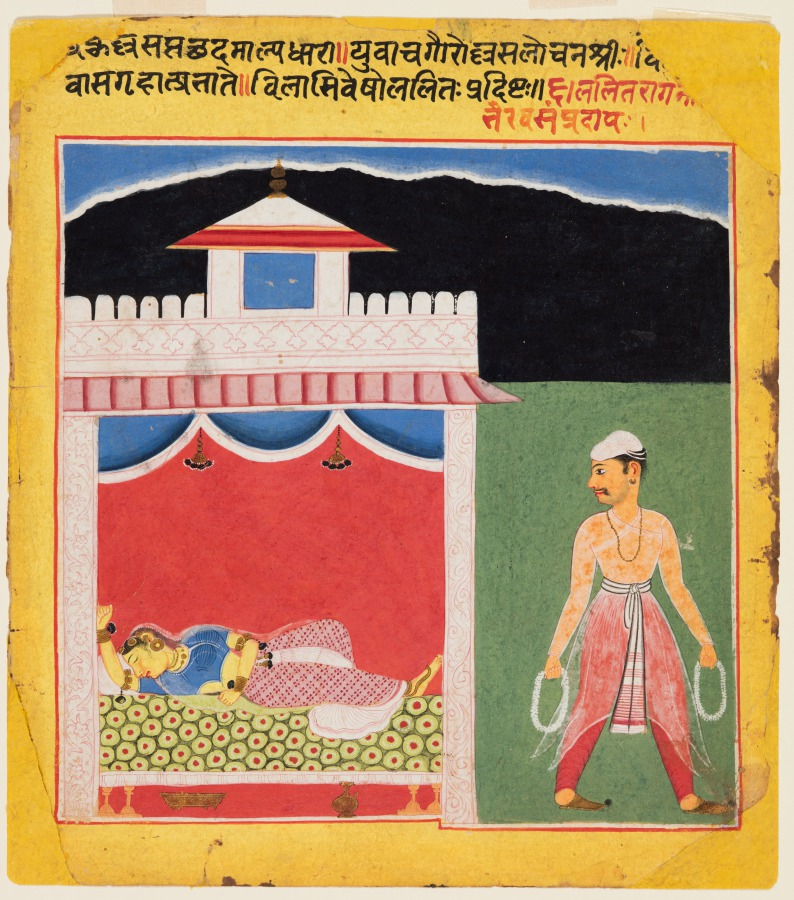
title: The Lover Leaves Wistfully in the Morning after a Passionate Tryst: Lalit Ragini, from a Ragamala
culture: Central India, Madhya Pradesh, Malwa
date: c. 1600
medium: Gum tempera and gold on paper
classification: Painting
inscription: Three line Sanskrit inscription in the yellow text panel; short Sanskrit inscription on the reverse. Yellow border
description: After a night of lovemaking, the lover leaves his sleeping consort early in the morning. He thoughtfully turns his head to take a last look at his beautiful beloved before departing. The heroine, unaware of her lover’s egression, slumbers on the footed bed with boldly patterned textile. The break of dawn has been depicted with the depiction of blue sky overlapping the black background.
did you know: The hero carries two garlands in his hands as souvenirs of the previous night.